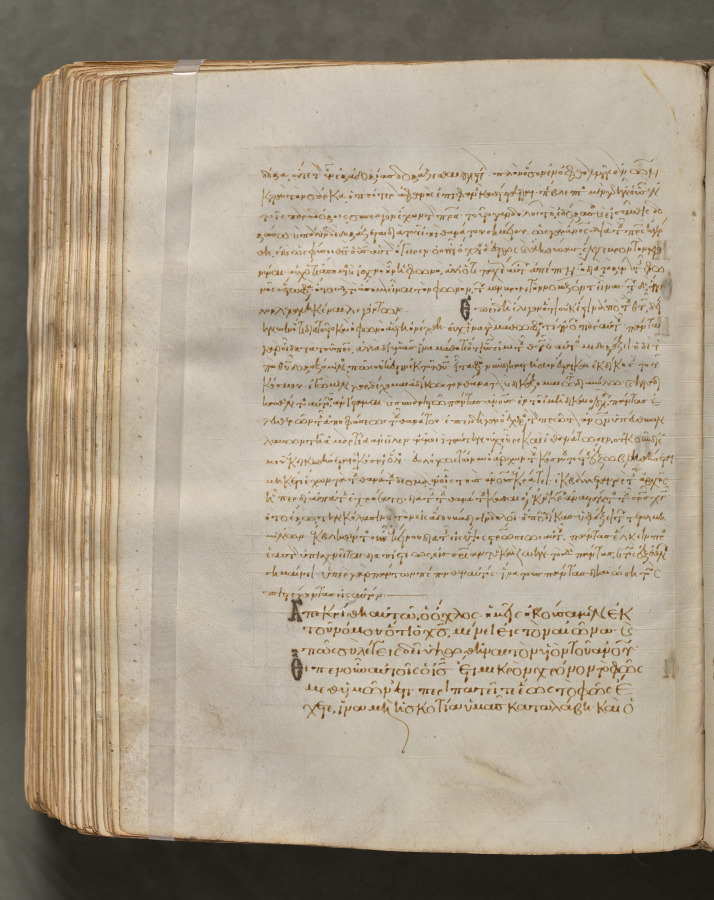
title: Text, folio 385 (verso), from a Gospel Book with Commentaries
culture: Byzantium, Constantinople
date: c. 1000–1100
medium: ink, tempera, and gold on vellum; leather binding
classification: Bound Volume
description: Each of the four gospels in this book opens on a page with brilliantly illuminated borders depicting the author of the text as well as birds—principally peacocks, symbols of the immortality of the soul—and fountains, representing the fountain of life and the salvation of the soul. This volume consists of 428 leaves with texts in Greek. Its level of sophistication suggests that it was probably written and decorated in a monastery in Constantinople.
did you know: Gospel books were carried in procession through Byzantine churches.